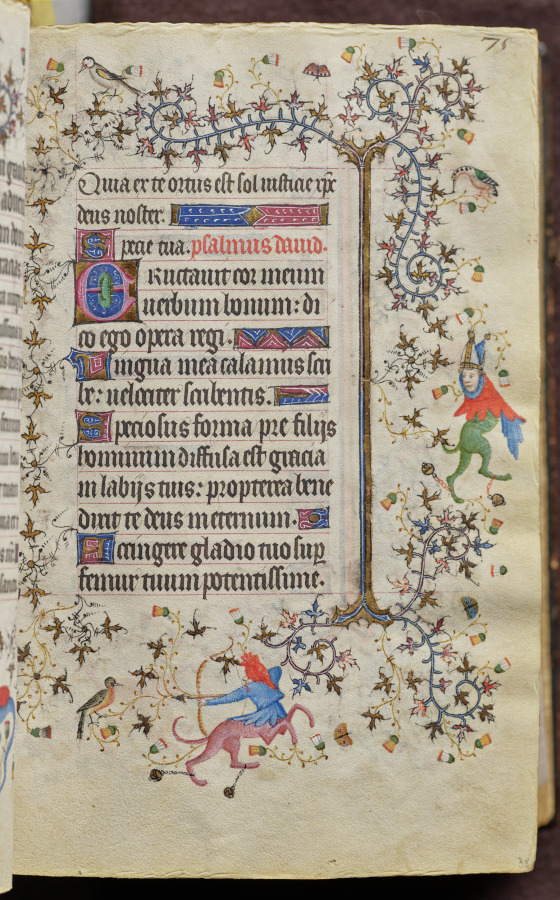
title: Hours of Charles the Noble, King of Navarre (1361-1425): fol. 38r, Text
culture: France, Paris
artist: Master of the Brussels Initials and Associates (French)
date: c. 1405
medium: ink, tempera, and gold on vellum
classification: Bound Volume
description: This precious volume was obviously highly prized by its owner, the French-born King of Navarre, who had his coat of arms painted on no less than twenty folios. Rather than directly commissioning this manuscript from a specific workshop, it seems that Charles the Noble acquired his book of hours -- perhaps ready-made for the luxury market -- while on a trip to Paris in 1404-05. A collaborative effort, six painting styles are evidenced within the pages of this codex, those of two Italians, two Frenchmen, and two Netherlanders. The painter who was responsible for the planning and decoration of the book, and who produced seventeen of the large miniatures, was a Bolognese artist known as the Master of the Brussels Initials. His principal assistant, responsible for most of the borders, was a Florentine who signed his name "Zecho" da Firenze on folio 208 verso.